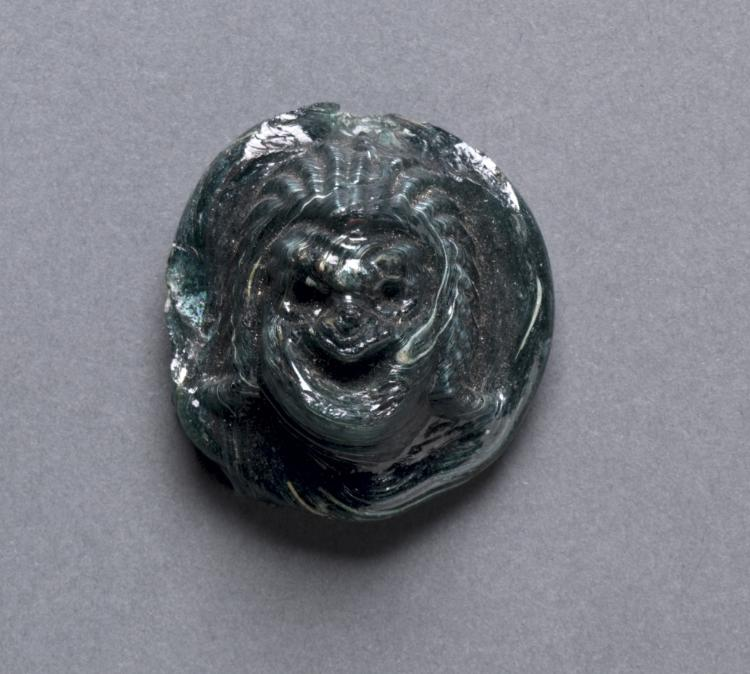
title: Comic Mask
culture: Greece, Greco-Roman Period, late Ptolemaic Dynasty to Roman Empire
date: c. 1–199 CE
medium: dark green glass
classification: Glass